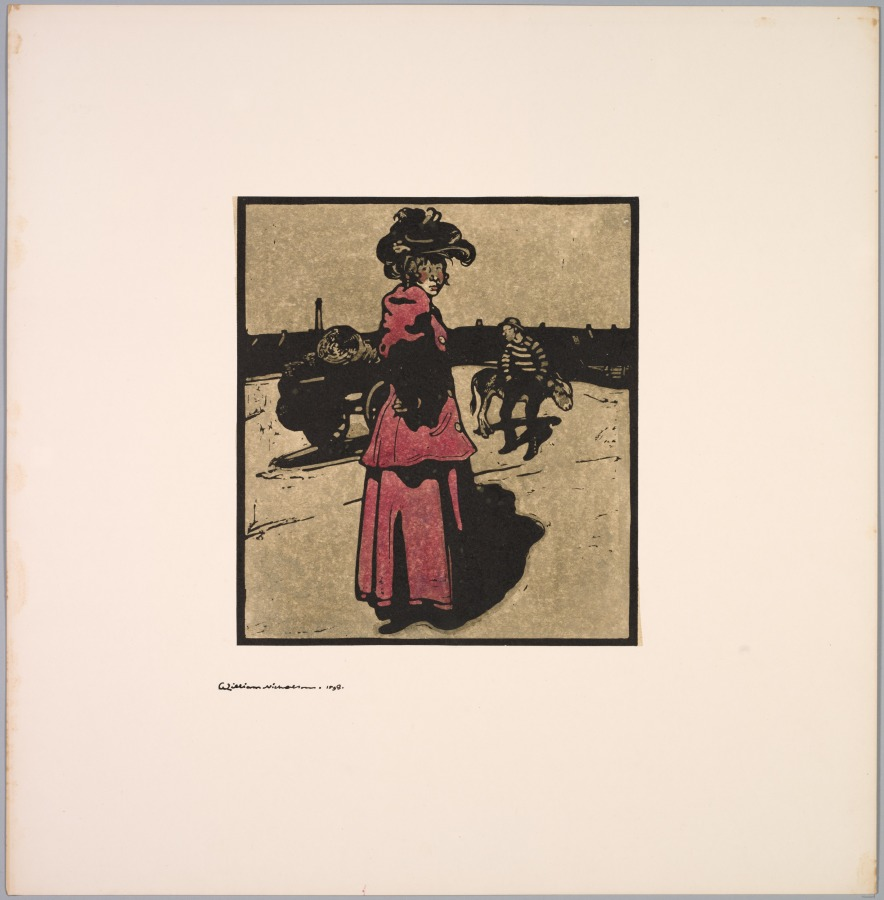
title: London Types: Coster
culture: England, 19th century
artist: William Nicholson (British, 1872–1949)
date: 1898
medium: woodcut hand-colored with watercolor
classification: Print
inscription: lower left margin, in black ink: William Nicholson - 1898 -